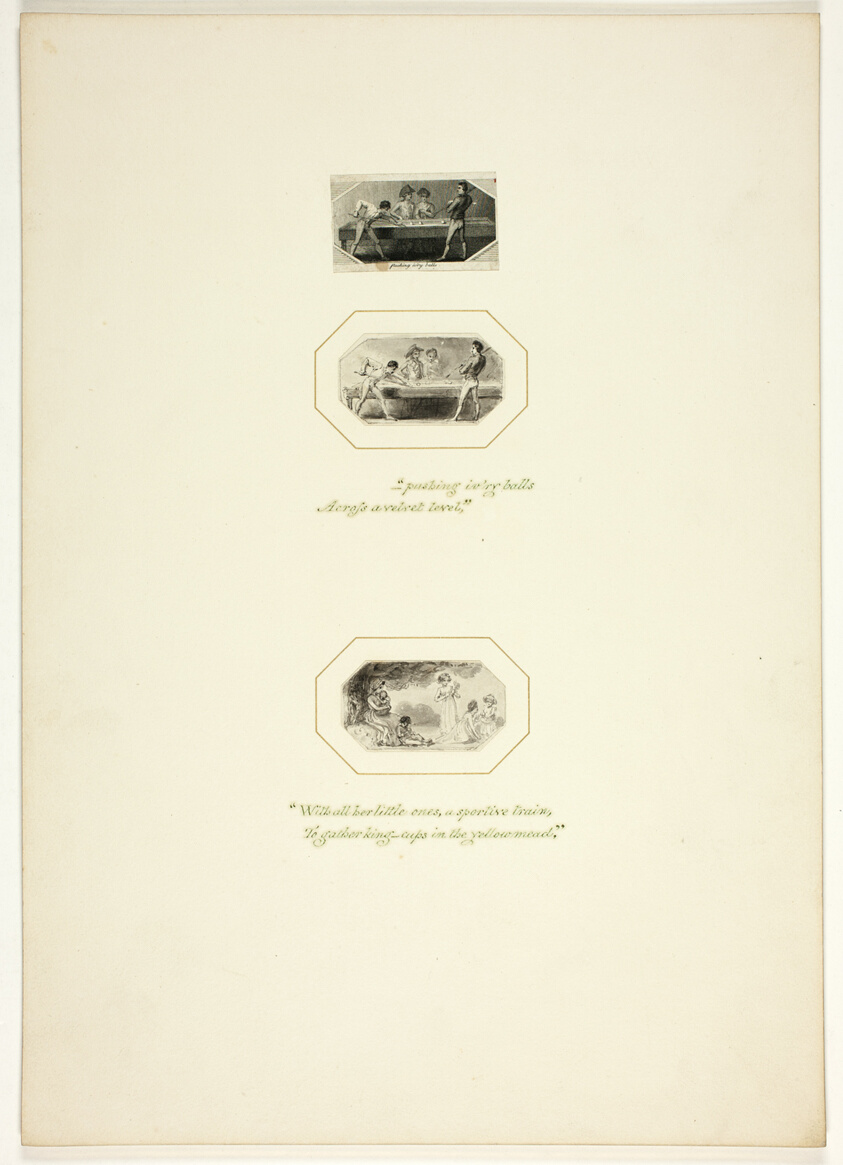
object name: Drawing and Watercolor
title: Study for a plate from The Task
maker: Thomas Stothard (English, 1755-1834)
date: c. 1800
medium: Ink wash on paper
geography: England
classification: ink or chalk wash; drawings (visual works); prints and drawing